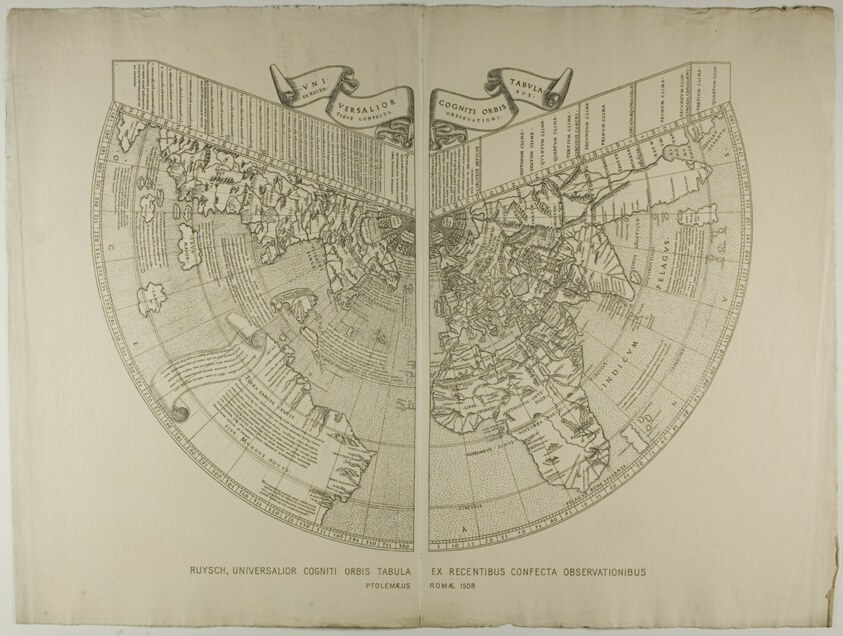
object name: Print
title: Universalior Cogniti Orbis Tabula, Ex Recentibus Confecta Observationibus Ruysch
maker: Unknown Artist; English, 19th century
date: 1508, reprinted 1889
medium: Woodcut in black on cream laid paper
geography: England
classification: reproduction; print; prints and drawing